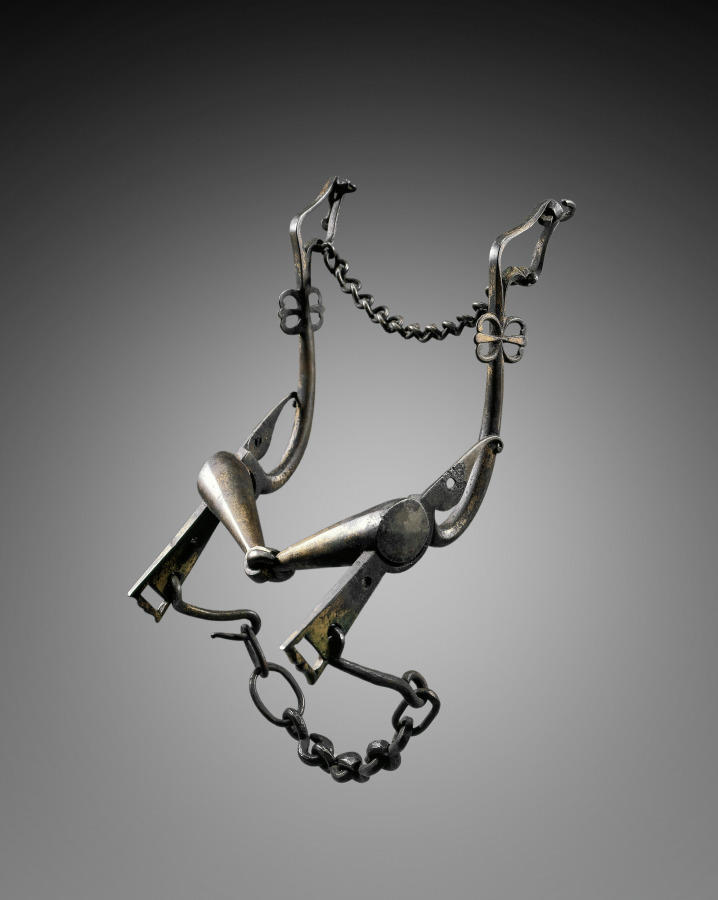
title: Curb Bit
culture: Germany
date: 1500s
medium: steel, traces of gilding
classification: Arms and Armor